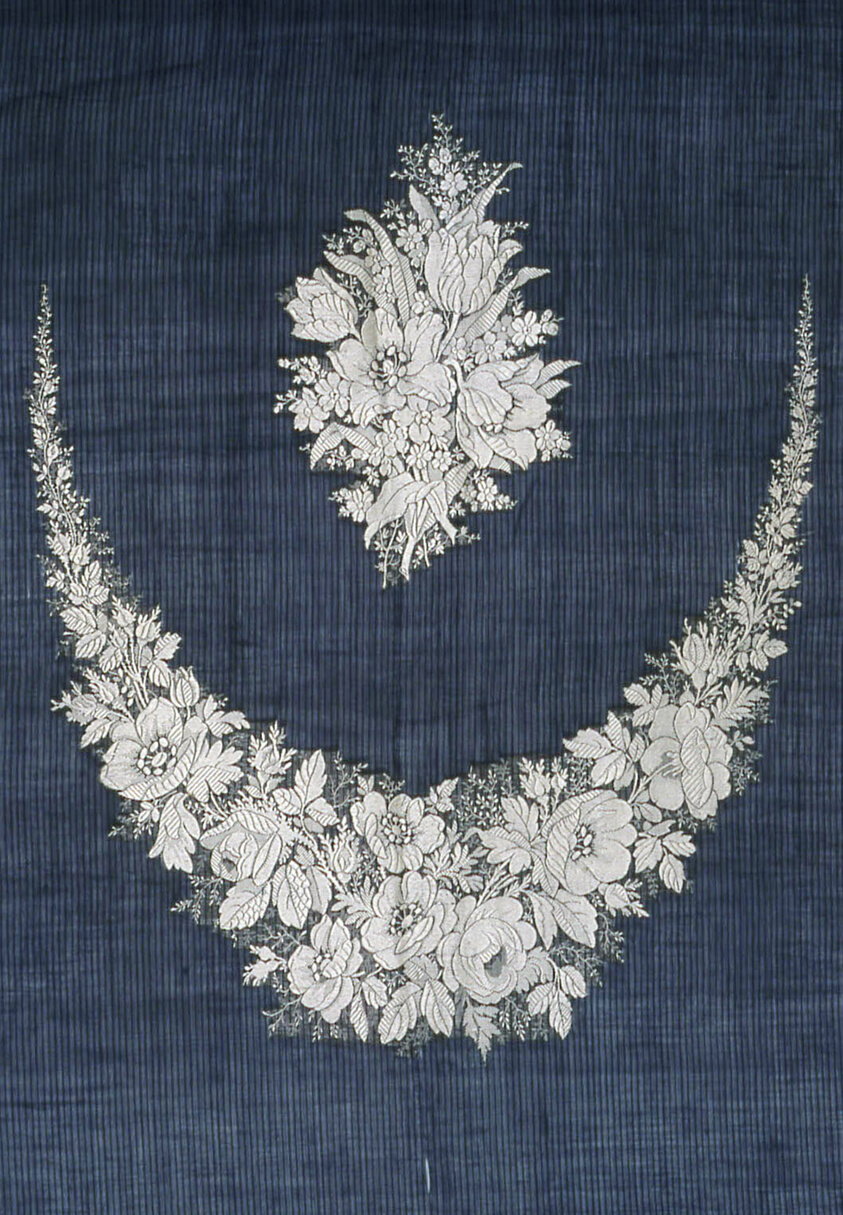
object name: Textile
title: Panel to be Used as Dress or Gown Inserts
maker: Probably France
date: Mid–19th century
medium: Cotton and silk, plain weave with supplementary brocading wefts; woven on loom with Jacquard attachment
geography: France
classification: textile; weaving; costume